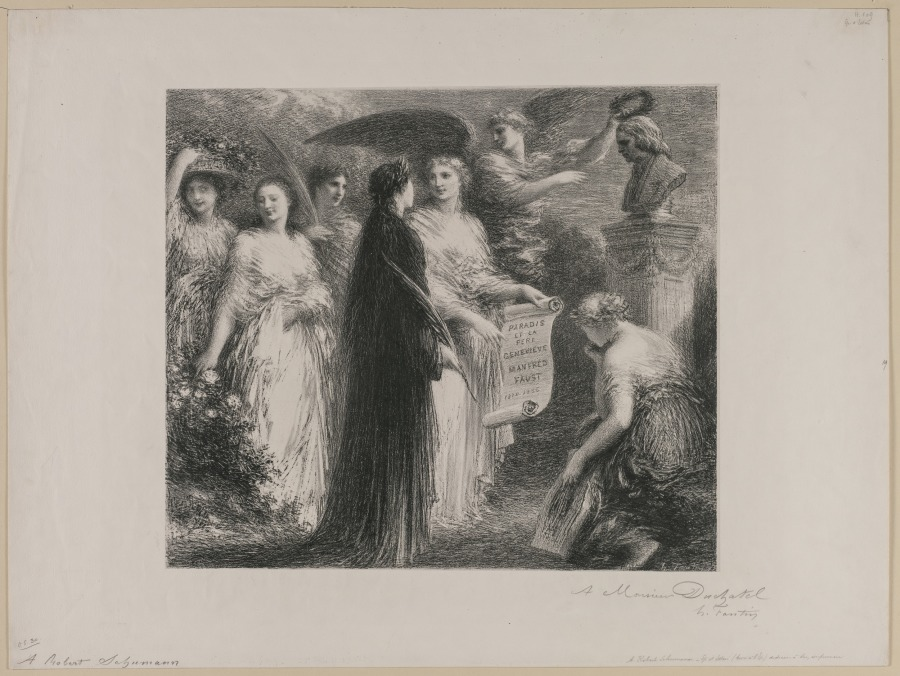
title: To Robert Schumann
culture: France, 19th century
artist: Henri Fantin-Latour (French, 1836–1904)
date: 1894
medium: lithograph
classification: Print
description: Passionately engaged with music, Fantin-Latour began to explore musical themes in his art after he attended the first full production of Wagner’s Ring Cycle in 1876 in Bayreuth, Germany. Lithographs such as To Robert Schumann earned Fantin the reputation as "the artist who made music visible." To his admirers, Fantin did not merely illustrate operatic scenes, but "wrapped his soul in music . . . and with wondrous dexterity drew . . . the visions he heard."